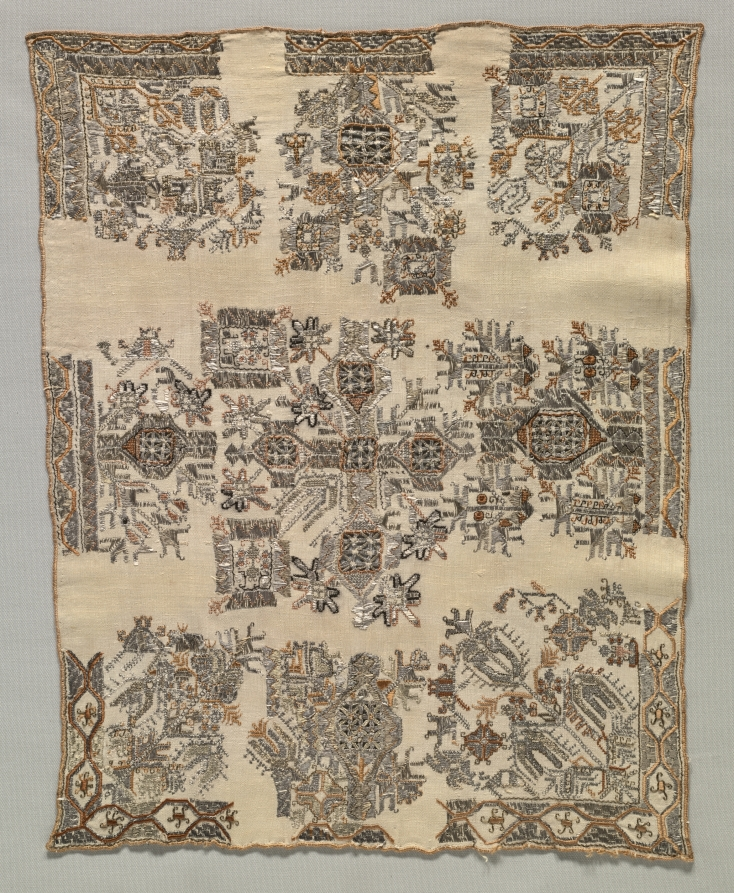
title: Kerchief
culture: Greece, Northern Islands, Chios ?, late 19th century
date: late 1800s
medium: embroidery, silk and metallic threads, on silk tabby ground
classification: Embroidery